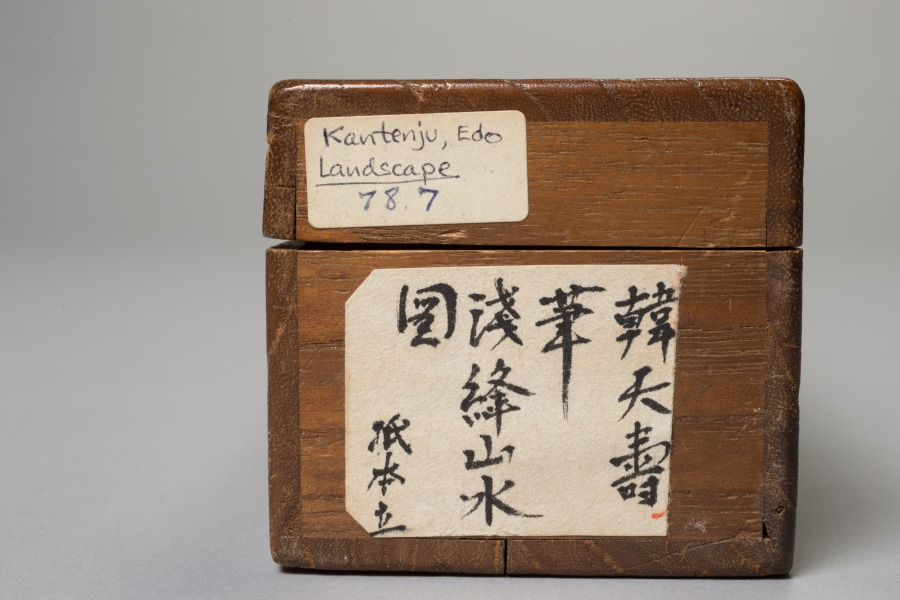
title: Landscape with Gentle Peaks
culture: Japan, Edo period (1615–1868)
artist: Kan Tenju (Japanese, 1727–1795)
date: 1767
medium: hanging scroll; ink and light color on paper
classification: Painting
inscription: 雨過嵐光煙／雲陽樹影諫／夕陽独在左／？卷讀残書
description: A figure sits in a retreat tucked into the mountains near a waterfall. The painter, Kan Tenju, was best known as a calligrapher and seal carver. Of Korean heritage, he was a patron of artist Ike Taiga (池大雅) (1723–1776), and a cousin of Taiga’s student Aoki Shukuya (青木 夙夜) (died 1802). His Chinese-style poem reads as follows: Smoky mist in the mountain reflects light after the rain, Sunlight passes through the clouds to cast shadows of the trees, Alone in the sunset, I read a well-worn book.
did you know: This painting combines image and calligraphy, connected by skillful brushwork.